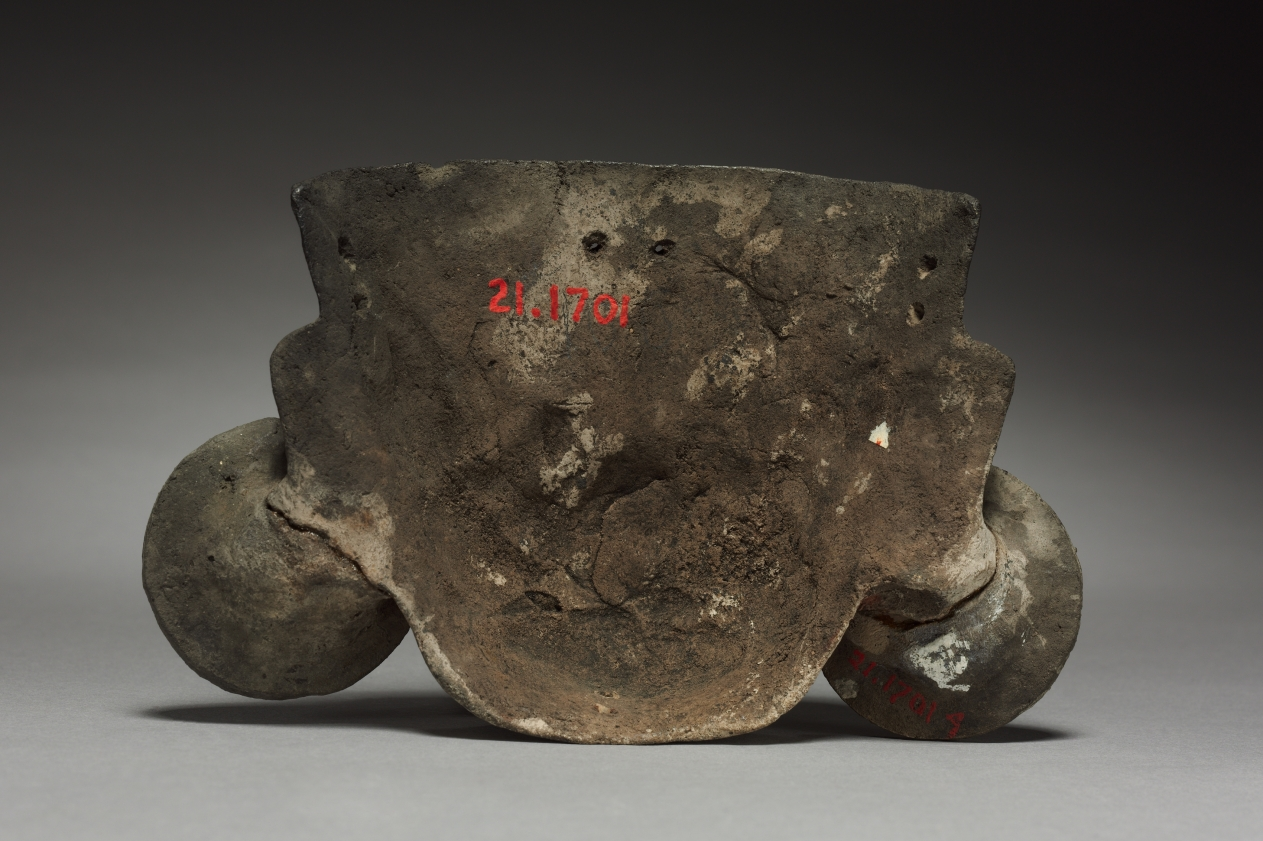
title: Mask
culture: Central Mexico, Teotihuacán, Classic period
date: 1–550 CE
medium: ceramic, slip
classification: Ceramic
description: Many Teotihuacán masks were once tied to something via holes on the back--perhaps a body-shaped form dressed in garments, ornaments, and a headdress that identified the figure. The stone masks’ eyes and mouths once held inlays representing irises, pupils, and teeth.